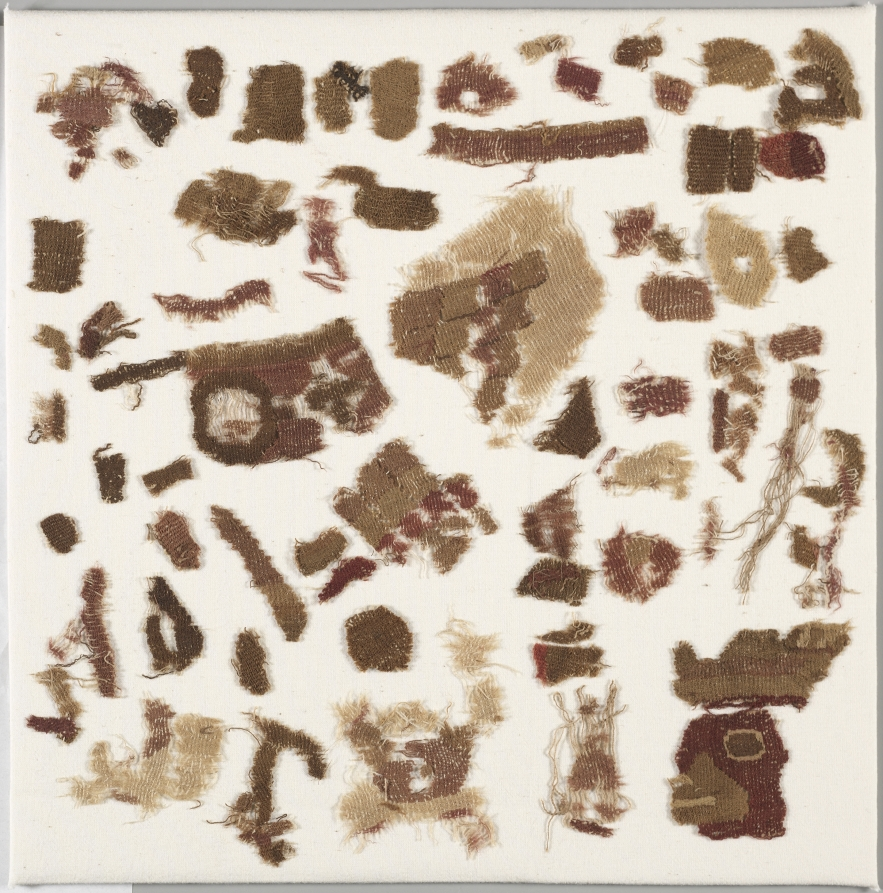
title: Textile Fragments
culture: Peru, Moche, north coast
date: c. 50–650 CE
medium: cotton and camelid fiber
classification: Textile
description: These fragments are rare survivors of catastrophic rains that destroyed much of the Moche textile legacy and may have helped to bring about the decline of Moche culture. Each depicts a serpent and a snail beneath a hovering raptorial bird—perhaps a snail kite, a type of hawk named after its favored food. The size of the motifs implies that the original textile was large; a mantle (a shawl-like garment) or a hanging are among the possibilities.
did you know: These fragments are rare survivors of floods that destroyed much of the Moche textile record.